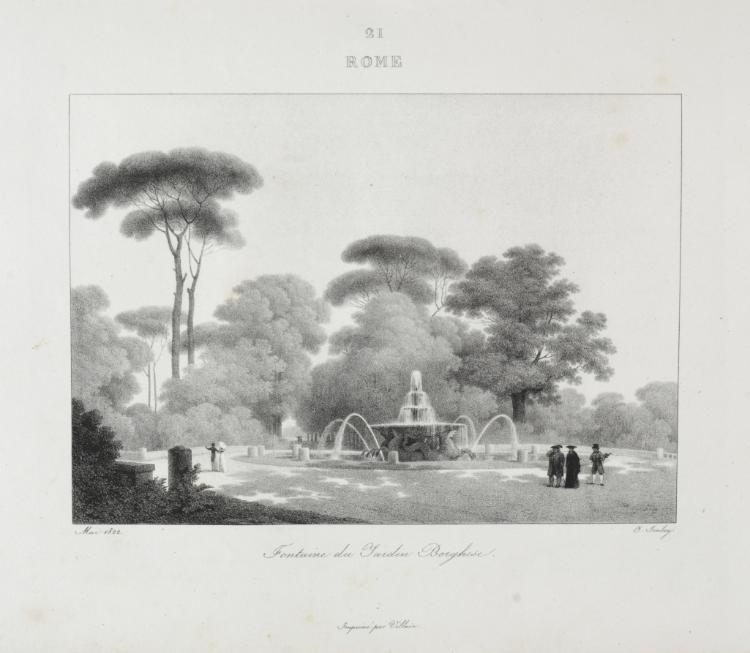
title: Voyage en Italie en 1822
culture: France, 19th century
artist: Jean-Baptiste Isabey (French, 1767–1855)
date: 1833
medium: lithograph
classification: Bound Volume